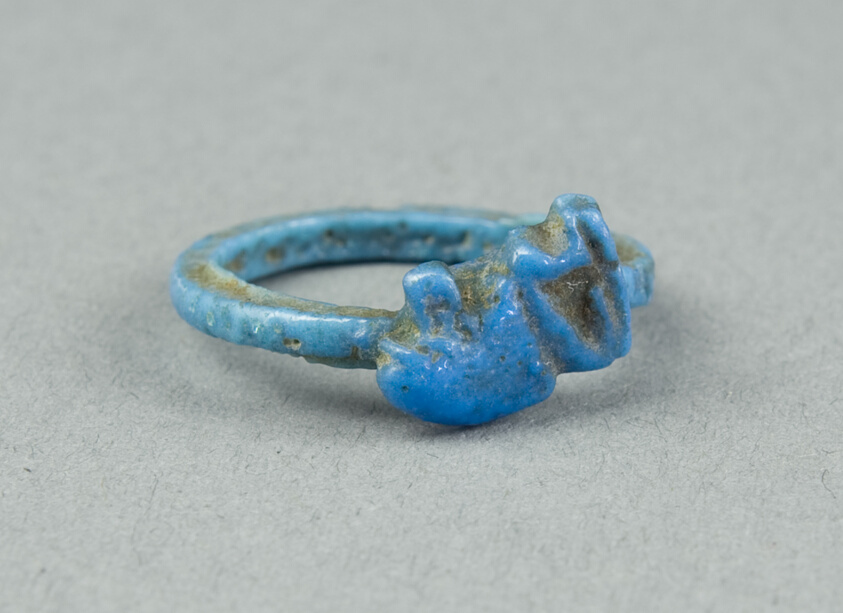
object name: Costume and Accessories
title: Ring: Figure of Seated Baboon (Thoth)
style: new kingdom, eighteenth dynasty, ancient, egyptian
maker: Egyptian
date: New Kingdom, Dynasty 18 (about 1390 BCE)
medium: Faience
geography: Egypt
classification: ring (jewelry); ceramics; jewelry; ancient art; costume; faïence (composite material)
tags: baboon, gods (deities), deities